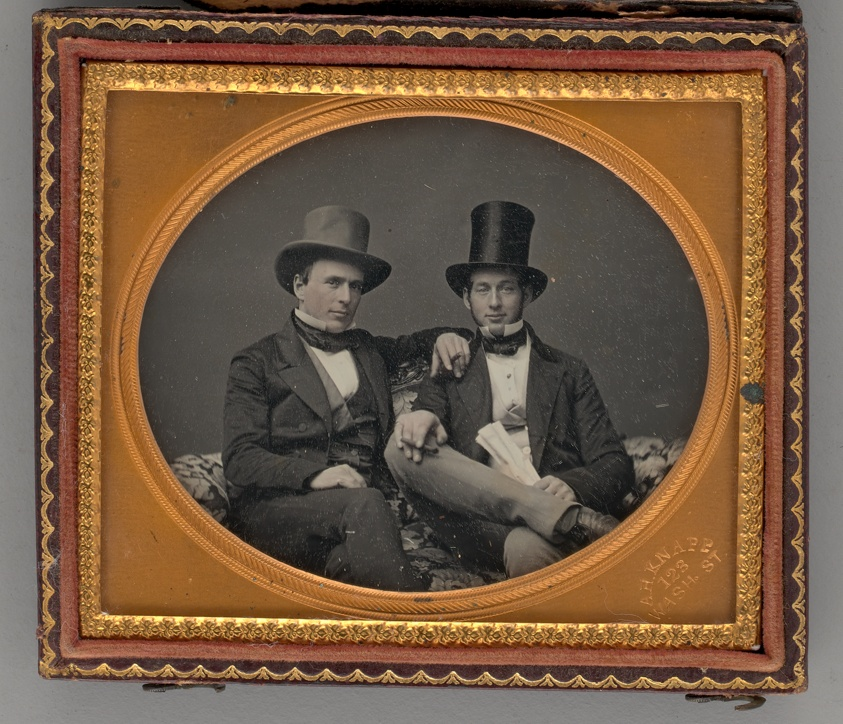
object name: Photograph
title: Untitled (Portrait of Two Seated Men Wearing Top Hats)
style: 19th century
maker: A. H. Knapp; American, active 1850s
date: 1856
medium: Daguerreotype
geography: United States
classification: portrait; photograph; photographic process; photography; portrait; daguerreotype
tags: lundberg collection, portraits: multiple subjects, portraits: male subject, portrait, Male, hats, portraits